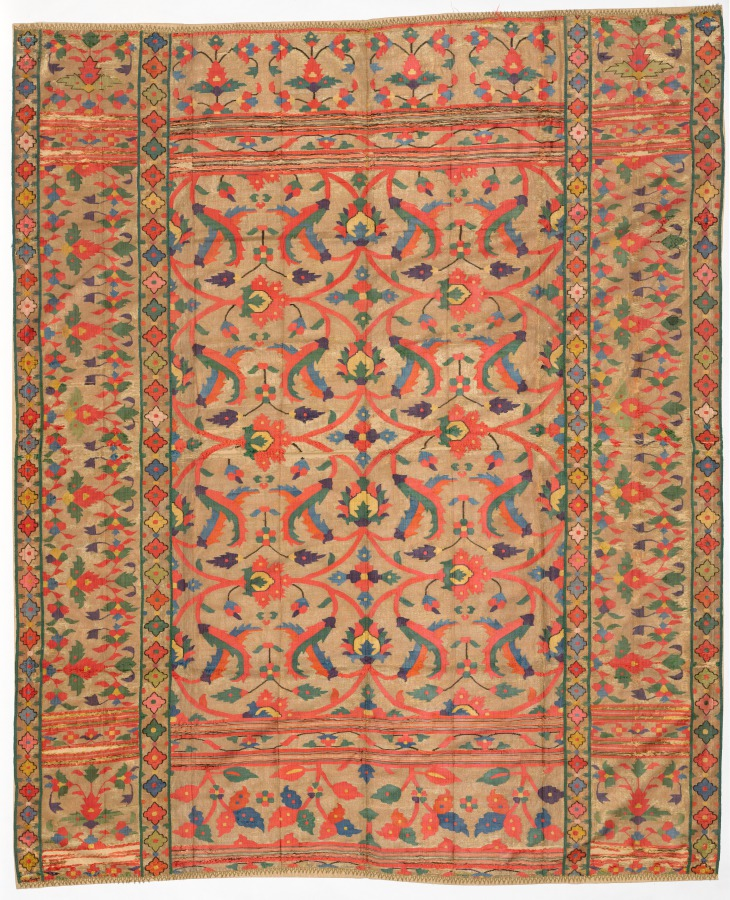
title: Fragment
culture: India, 18th-19th century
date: 1700s - 1800s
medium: tapestry weave: silk, metal thread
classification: Textile